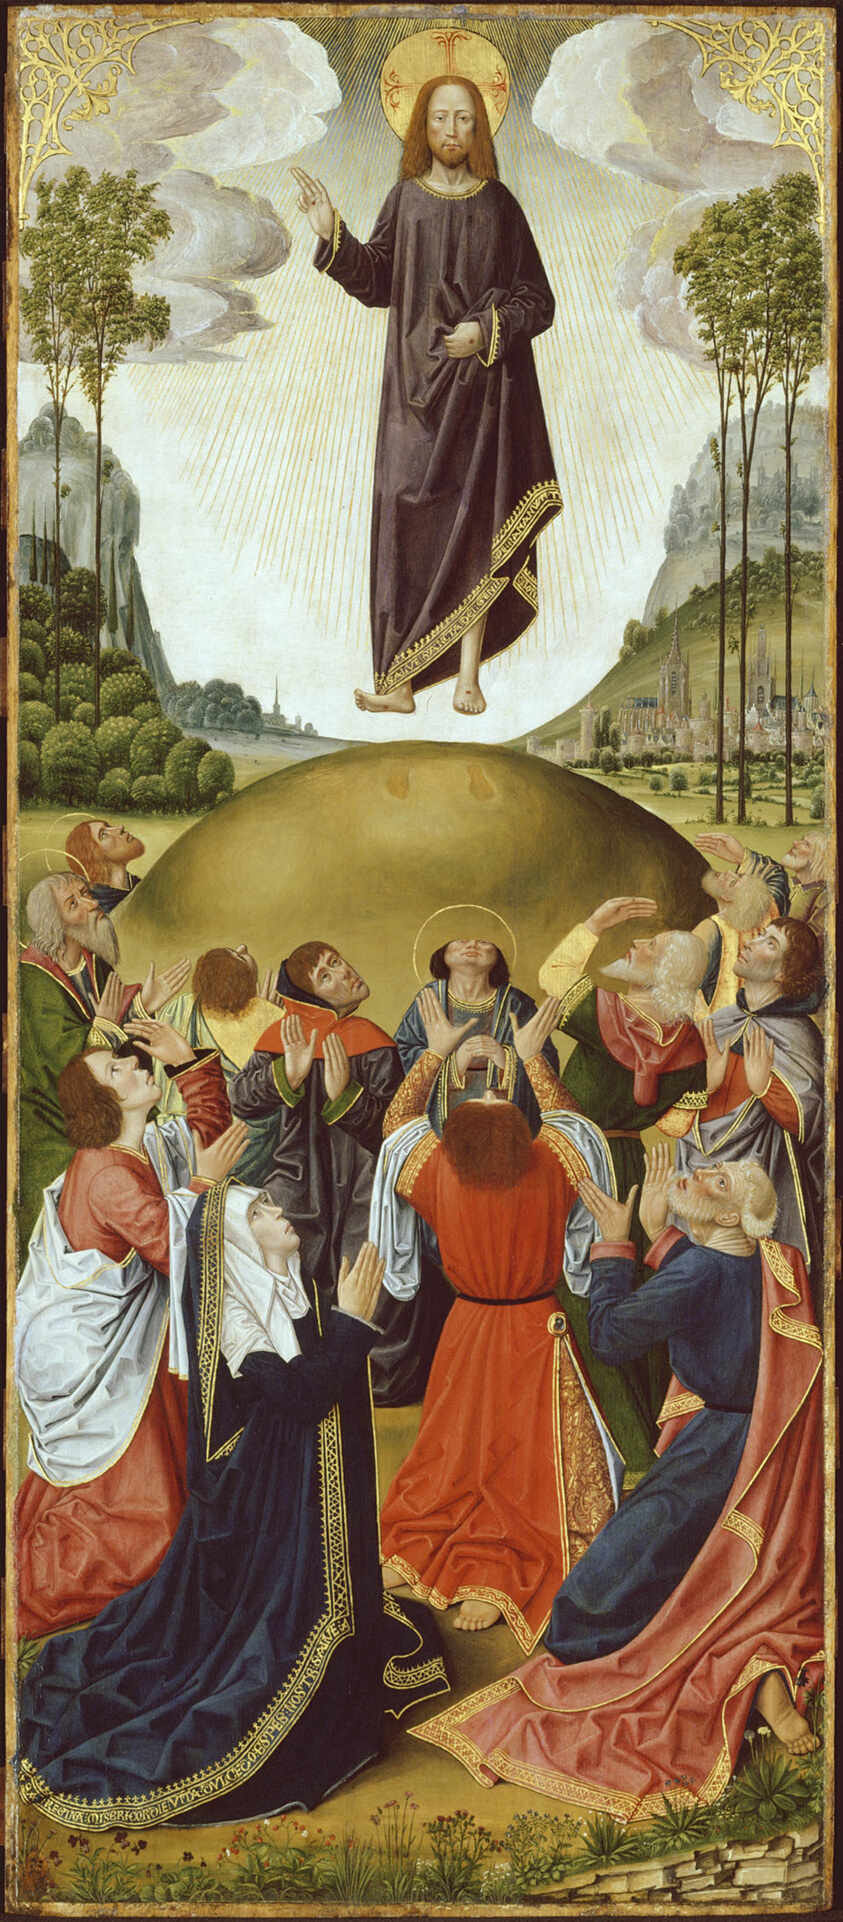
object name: Painting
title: Altarpiece from Thuison-les-Abbeville: The Ascension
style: 15th century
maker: French; Picardy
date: c. 1495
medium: Oil on panel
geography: France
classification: oil on panel; altar; france; french; oil paintings (visual works); paint; painting; european painting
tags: religious scenes, trees, men, saints, Jesus, biblical, landscape, religious figures, religious, religion, Christianity, Christian subjects, Century of Progress, world's fairs, Chicago World's Fairs